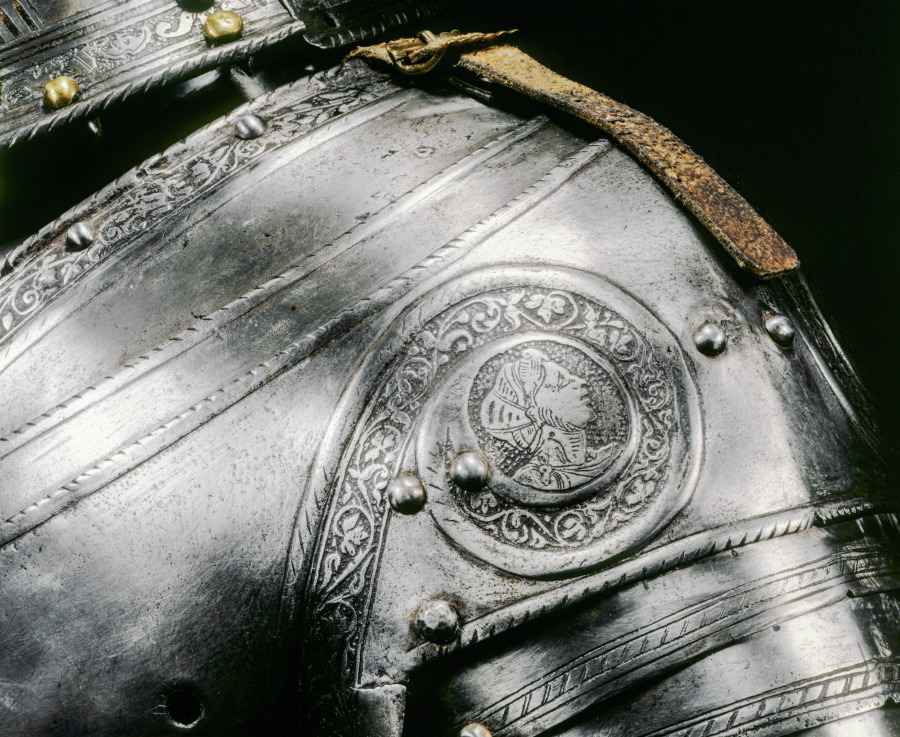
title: Breastplate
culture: North Italy, Brescia (?), 16th century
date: c. 1575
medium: steel with etched decorative bands and roundels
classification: Arms and Armor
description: Decoration was critical to fine armor, and etching was the most commonly used technique. Here, the bands along the borders are etched. On the breastplate, pauldrons (shoulder guards), and tassets (hip and upper leg guards), etched medallions enclose profile busts reminiscent of ancient Roman portraits. The lance rest on the breastplate indicates that this half-suit was once part of a complete field armor for man and horse. The etching technique used for armor was developed in the late 1400s. The metal surface was first coated with an acid-resistant substance, such as wax or varnish. An etching needle was then used to scratch a design into the surface. The exposed areas were then treated with an acid that would "bite" or etch the lines into the metal. When the coating was removed, the etched design was blackened for contrast.